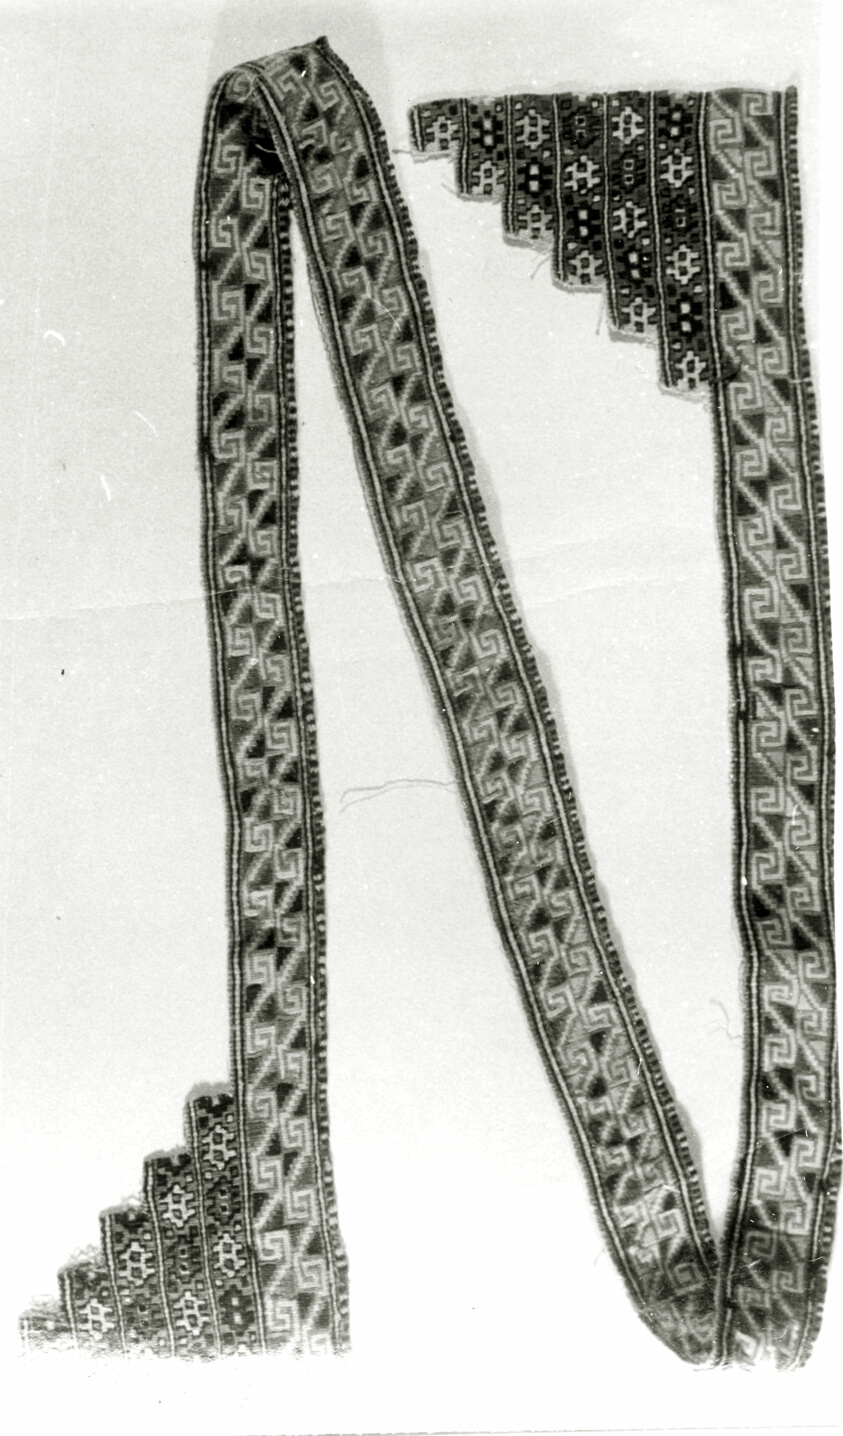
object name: Textile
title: Border (From a Garment)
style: moche, andean, andes, Pre-Columbian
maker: Moche-Wari; Peru, Possibly Huarmey Valley, north-central coast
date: A.D. 500/1476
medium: Cotton and wool; slit tapestry weave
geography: Peru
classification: textile; weaving